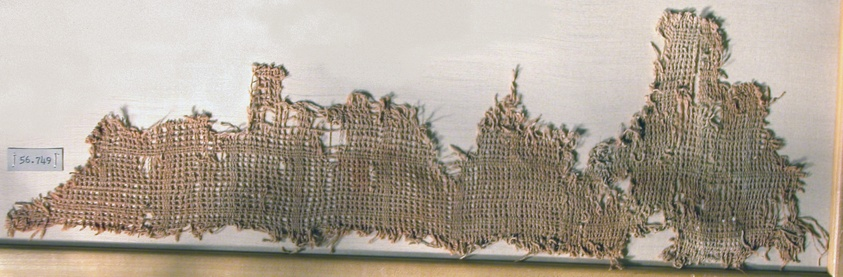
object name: Textile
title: Fragment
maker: Peru, north coast, Culebra Valley, La Capilla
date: A.D. 1000/1476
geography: Peru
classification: textile; weaving